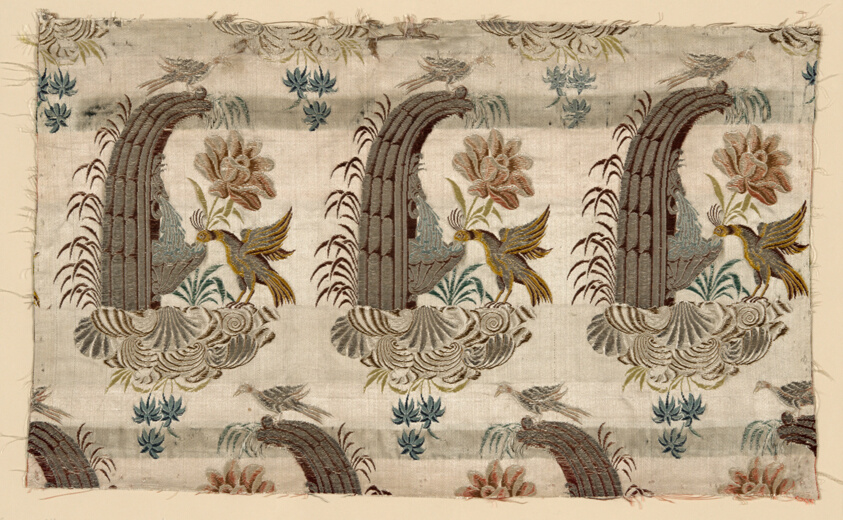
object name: Textile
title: Fragment (Dress Fabric)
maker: France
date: 18th century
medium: Silk and silvered-metal-strip-wrapped silk, warp-float faced satin weave with supplementary brocading wefts and self-patterned by ground weft floats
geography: France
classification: textile; weaving